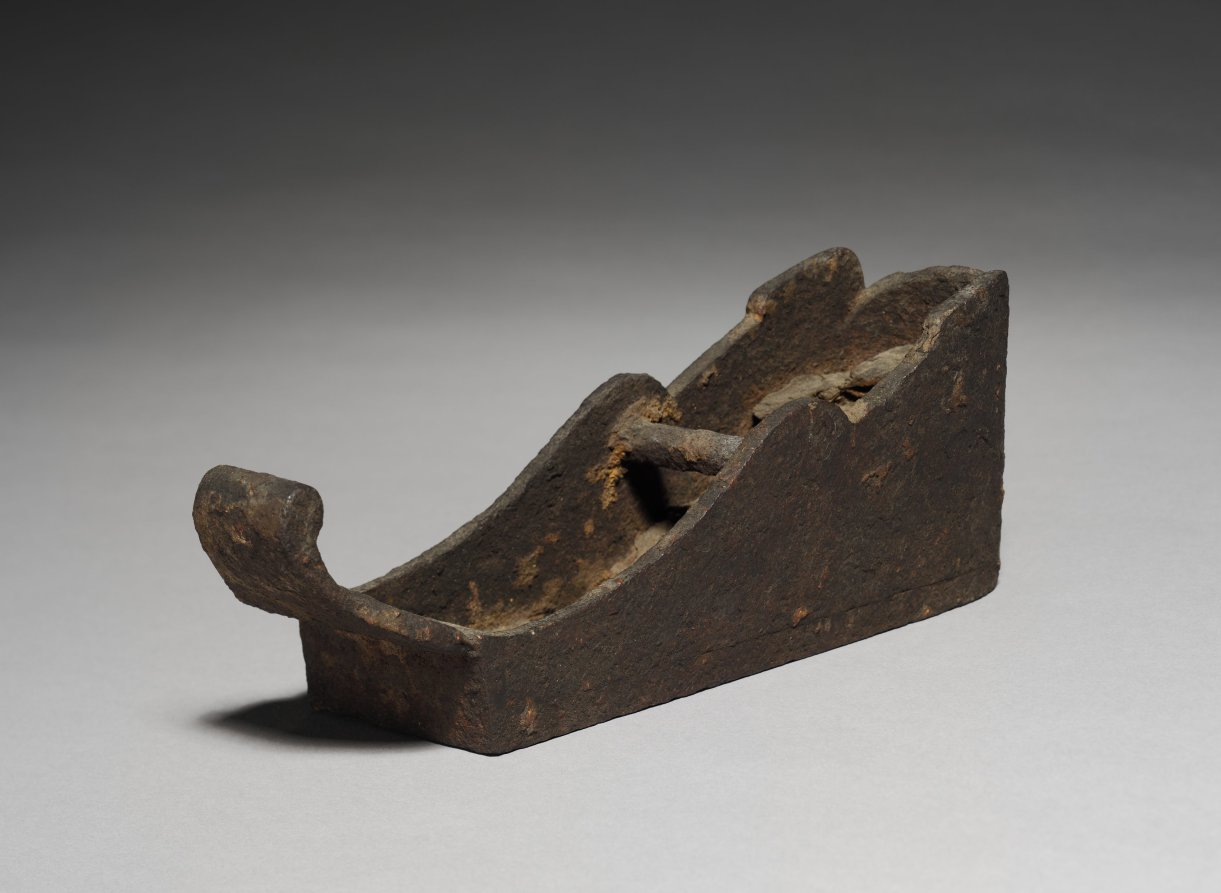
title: Carpenter's Plane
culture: Italy, 15th century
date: 1400s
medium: wood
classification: Tool